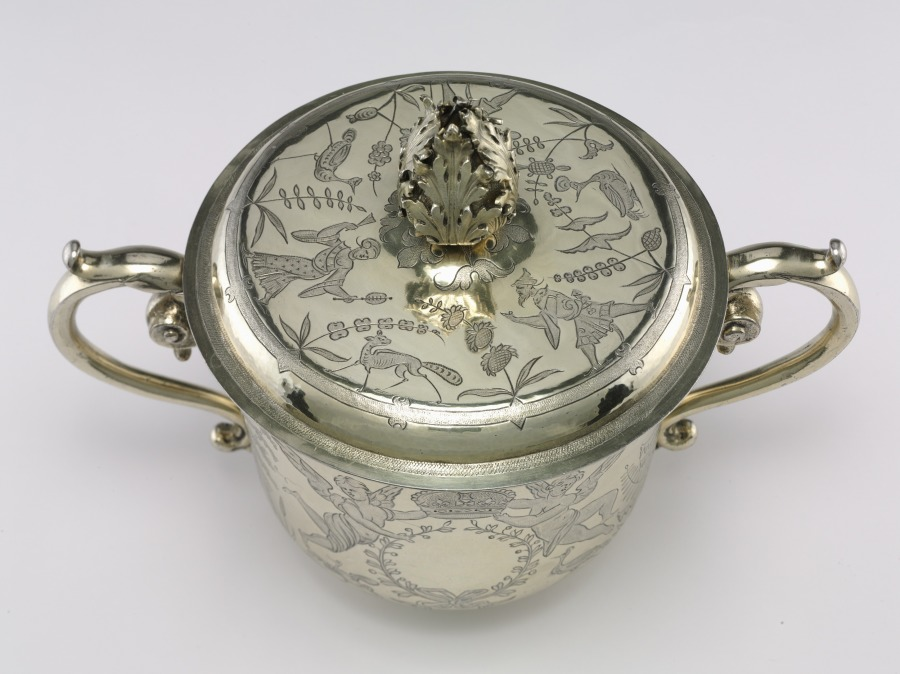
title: Two-Handled Cup and Cover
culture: England, London, 17th century (James II)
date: 1686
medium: silver gilt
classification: Silver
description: Produced a year after the coronation of James II (1633–1701), this silver cup celebrates the monarchy and reflects the political and social alliances that underpinned the aristocracy during the 1600s. During their coronation, James II and his second wife Mary of Modena (1658–1718) were carried through the city of London under a silk canopy adorned with motifs inspired by European perceptions of Chinese art, known as chinoiserie. Following the procession, the thirty-two lords involved in the ceremony were each offered a portion of the cloth from the canopy as well as sixteen troy ounces of silver from the posts. At least two of them commissioned cups adorned with chinoiserie to be made from the silver. While it is unclear if this cup once belonged to one of the thirty-two peers, it was almost certainly created in response to the same motifs and social developments.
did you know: The two female figures lift a crown on the front of this cup that closely resembles Saint Edward’s Crown, the heraldic emblem of the United Kingdom.